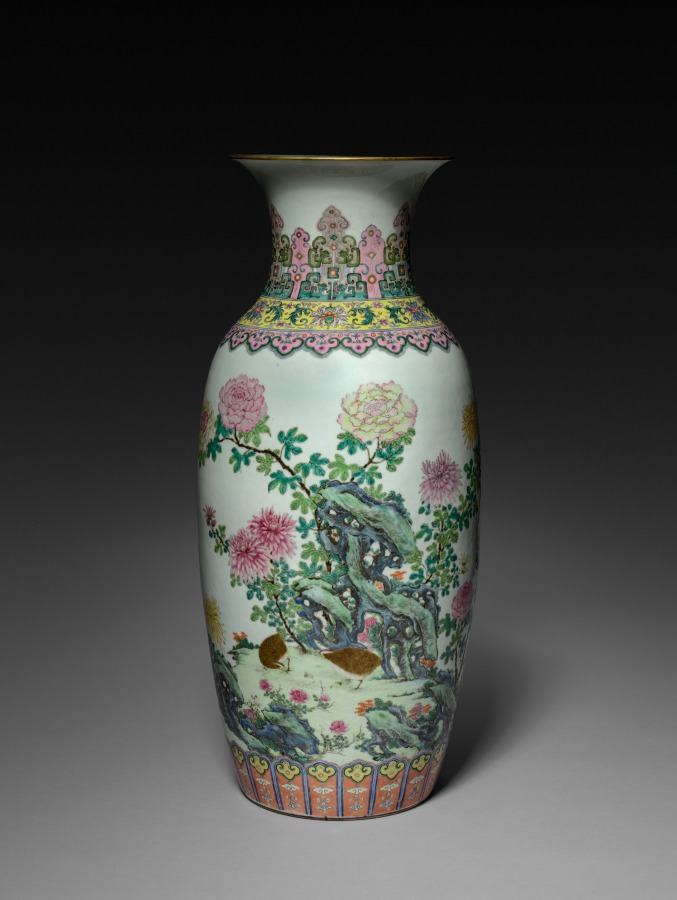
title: Vase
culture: China, Qing dynasty (1644–1911), Qianlong reign (1736–95)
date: 1736–95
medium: porcelain with famille rose overglaze enamel decoration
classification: Ceramic